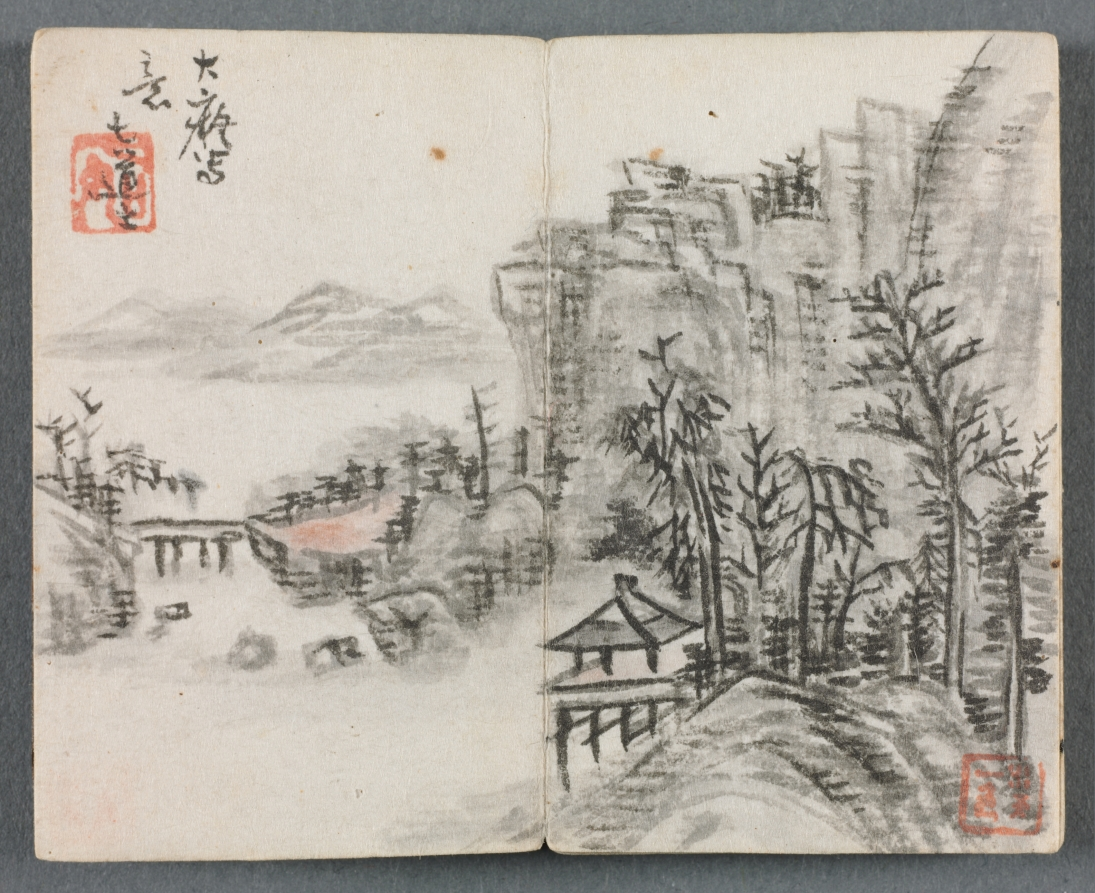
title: Miniature Album with Figures and Landscape (Cliff Landscape with Bridge)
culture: China, Qing dynasty (1644–1911), Qianlong reign (1736–95)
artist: Zeng Yandong (Chinese, c. 1751–1827)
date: 1822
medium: album leaf, ink and color on paper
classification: Painting